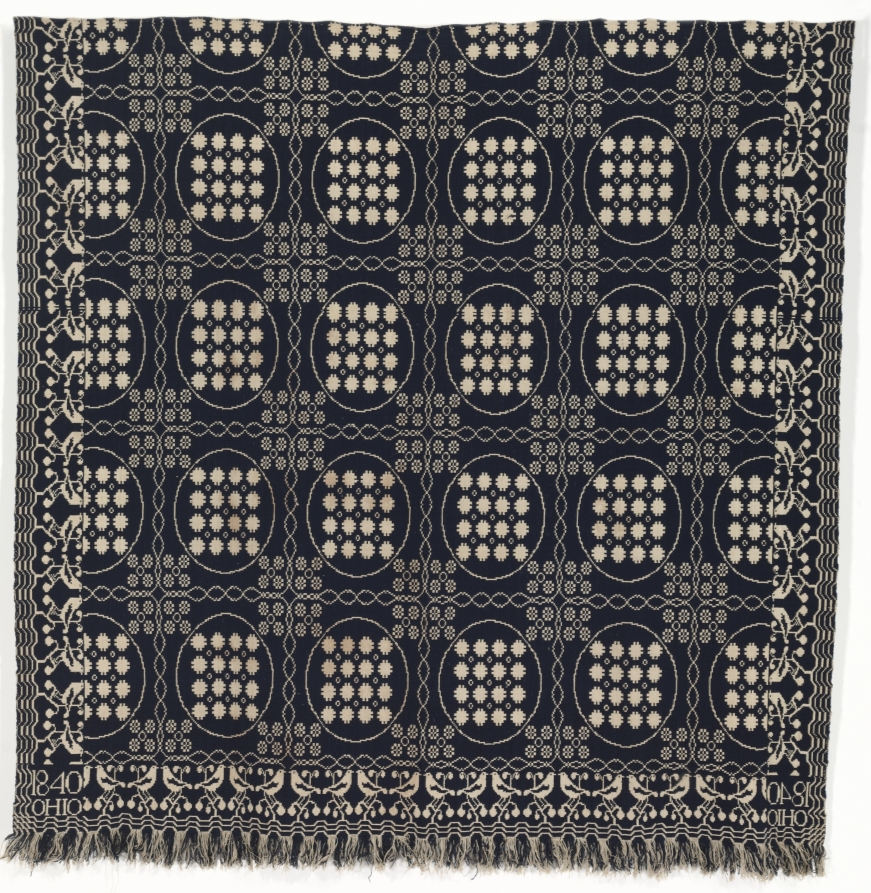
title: Coverlet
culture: America, Ohio, Clinton County, Port William, 19th century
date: 1840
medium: double weave: wool and cotton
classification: Textile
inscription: "1840 / OHIO" woven in two corners.